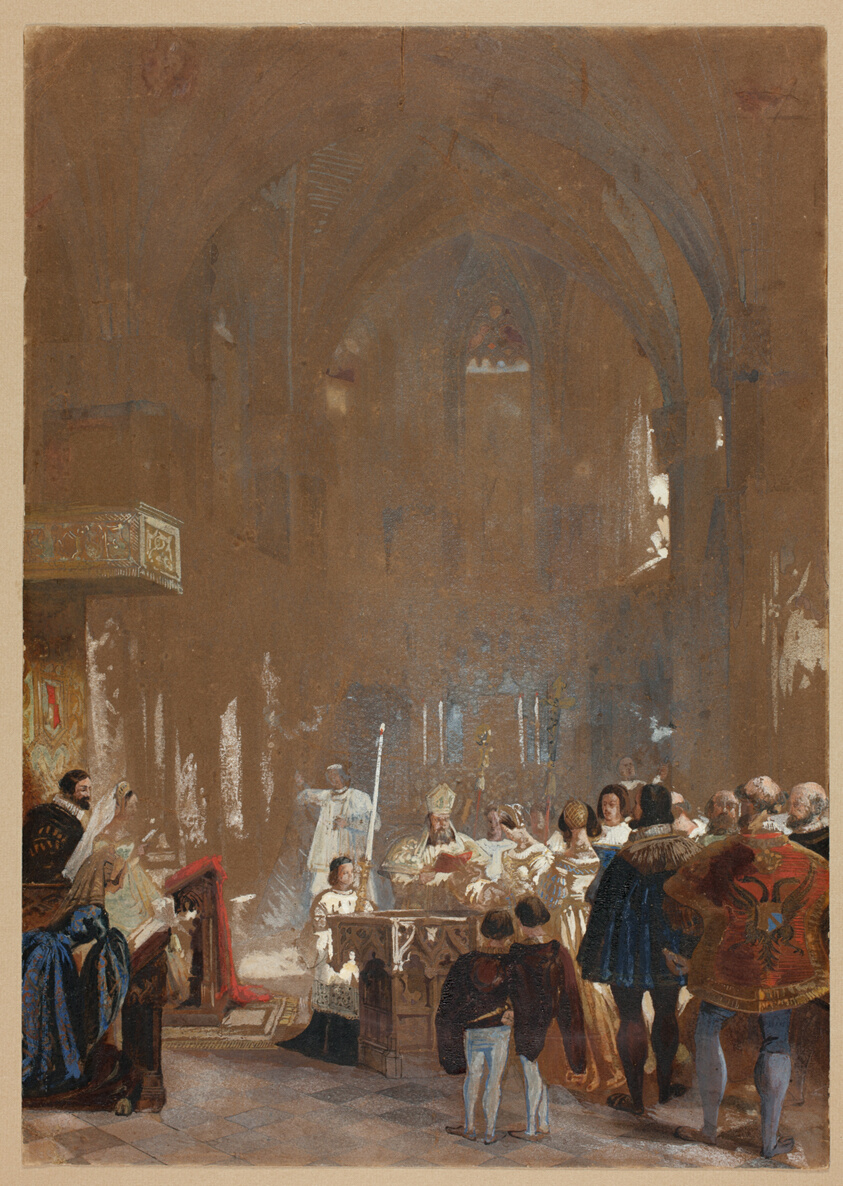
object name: Drawing and Watercolor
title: Ceremony in a Cathedral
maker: possibly Louis Haghe (Belgian, 1806-1885); or Joseph Nash (English, 1808-1878)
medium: Watercolor and gouache, heightened with gum varnish, on tan wove paper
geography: Belgium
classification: gouache; drawings (visual works); prints and drawing